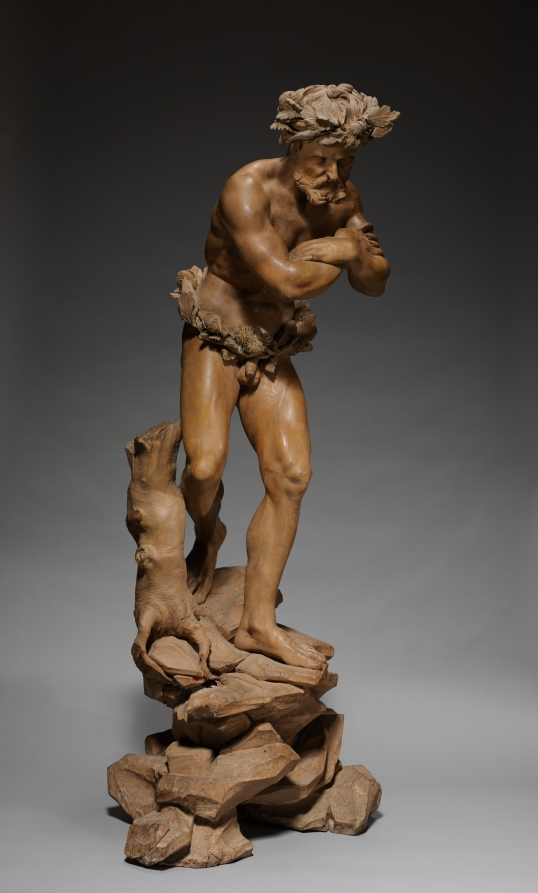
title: Winter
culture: Italy, 17th century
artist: circle of Filippo Parodi (Italian, 1630–1702)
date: c. 1700–1725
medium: wood with traces of gesso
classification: Sculpture